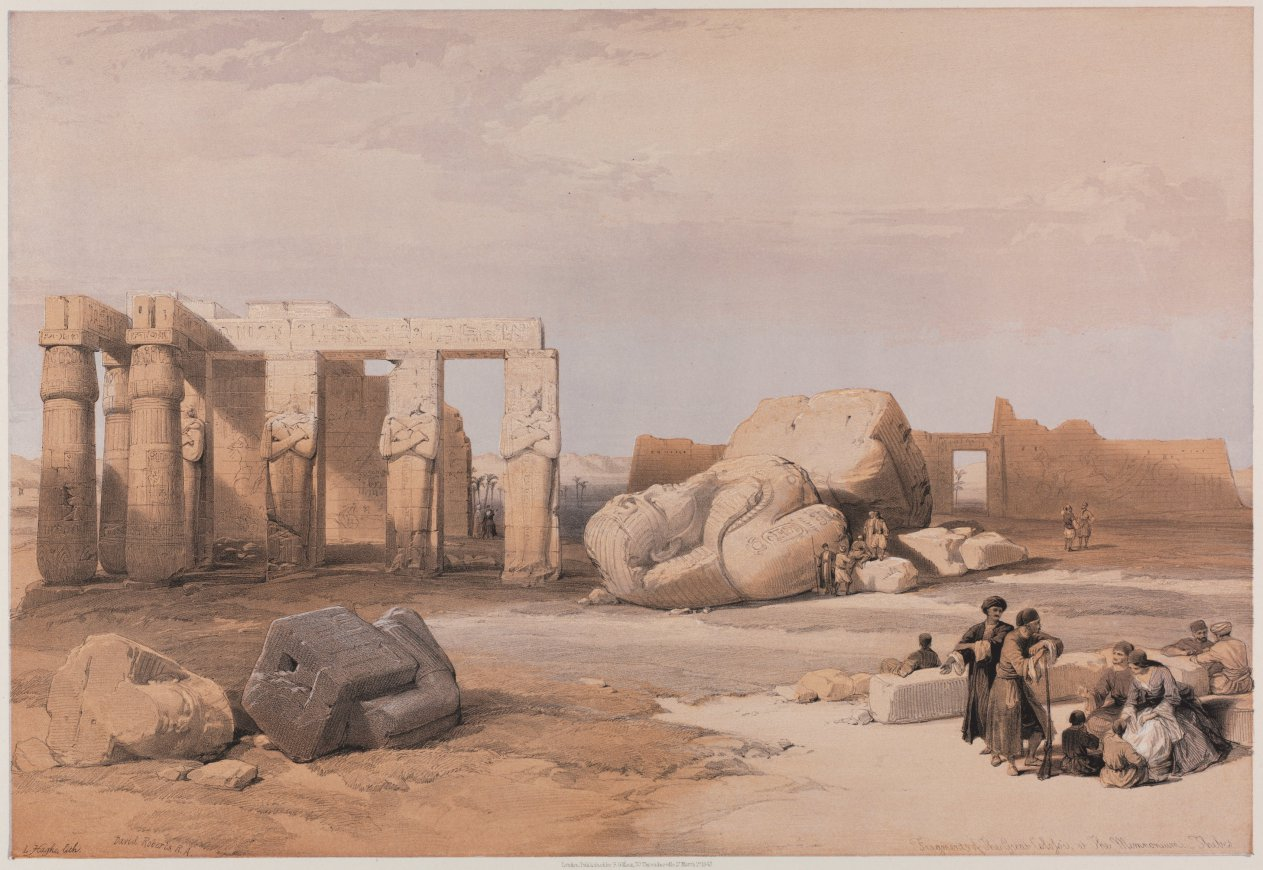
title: Egypt and Nubia, Volume II: Fragments of the Great Colossi at the Memnonium, Thebes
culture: England, 19th century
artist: Louis Haghe (British, 1806–1885)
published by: F. G. Moon, 20 Threadneedle Street, London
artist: after David Roberts (Scottish, 1796–1864)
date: 1847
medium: color lithograph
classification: Print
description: By the mid-19th century, the complexities of printing in numerous colors had been mastered, culminating in one of the high points of European printmaking. The plates drawn by Haghe, which copy the watercolors that David Roberts made in Egypt, are exquisite examples of color lithography. Egypt was a distant, mysterious country for Europeans and Haghe, a Scottish topographical and architectural artist who spent the year of 1838 traveling across this ancient land. The resulting prints—the first comprehensive series of views of the monuments, landscapes, and people of the Near East—were especially appreciated for their brilliant color and large scale. Collector John Bonebrake’s 134 prints of Egypt are an important addition to the Cleveland Museum of Art’s collection, and in a sense they have returned home: a large group of them was loaned to the 1992 exhibition Nineteenth-Century Views of Egypt.